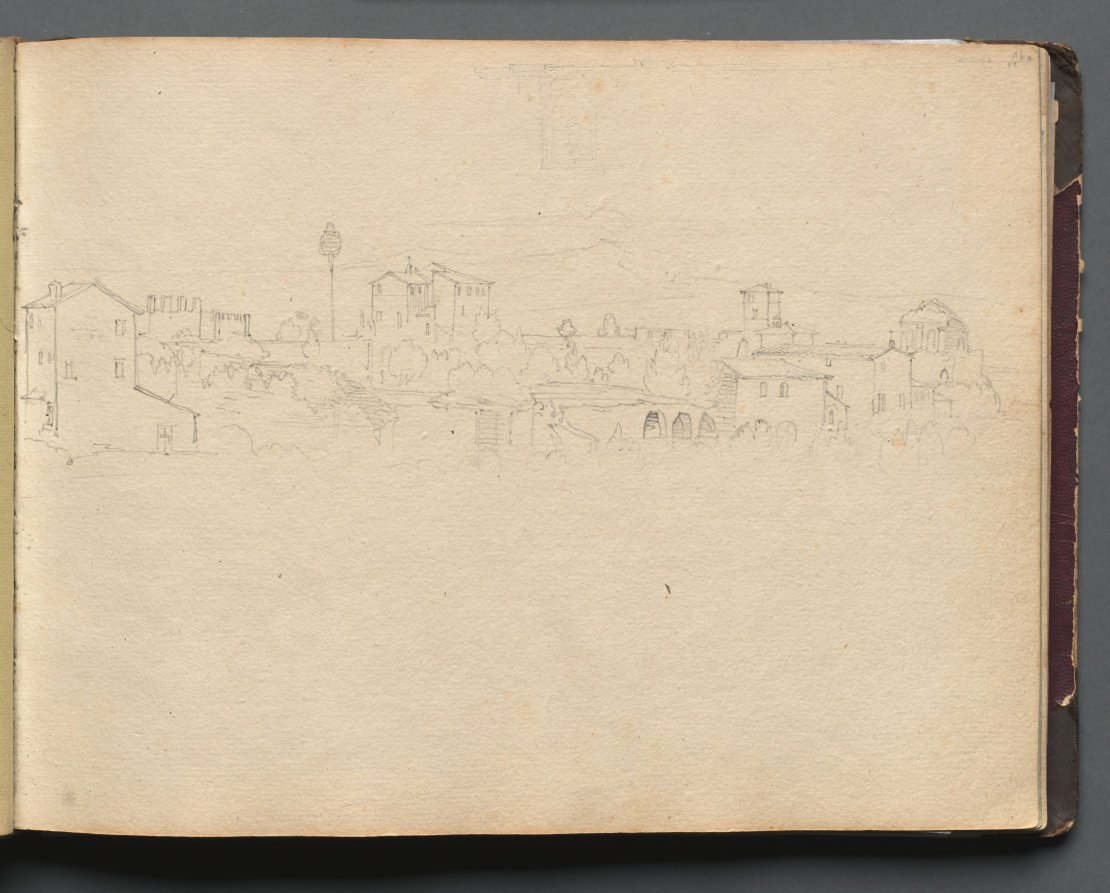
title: Album with Views of Rome and Surroundings, Landscape Studies, page 16a: Roman View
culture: Germany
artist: Franz Johann Heinrich Nadorp (German, 1794–1876)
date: c. 1830s-70s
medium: graphite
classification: Bound Volume